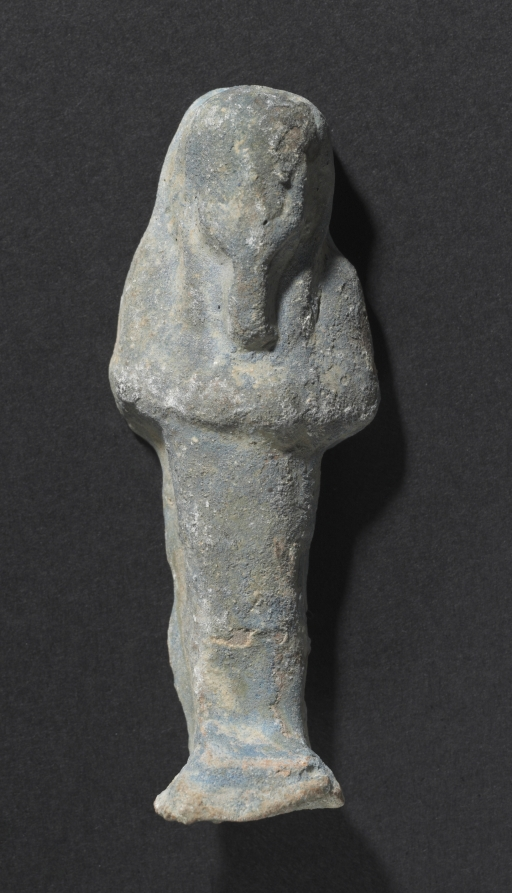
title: Shawabty of Ditamenpaankh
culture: Egypt, Late period (715–332 BCE), Dynasty 25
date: 715–656 BCE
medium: terracotta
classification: Funerary Equipment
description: High demand for shawabtys in the Late Period, a time when as many as 400 or more shawabtys were placed in the tomb with the deceased, gave rise to a specialized container for storing them: the shawabty box. This example is inscribed for the lady of the house, Ditamenpaankh, and was probably one of a pair originally made for her. The single-masted boat on the box's lid is perhaps an allusion to the pilgrimage of the deceased to the holy city of Abydos, the cult city of Osiris, king of the dead. The shawabtys inside are crude, mass-produced examples cast in an open mold. Made of terracotta, their blue paint imitates more costly shawabtys made of faience. As for the shawabty spell, it has been removed from its traditional location on the shawabty's front and relocated onto the sides of box, where it needed only to be written once, thus expediting production.